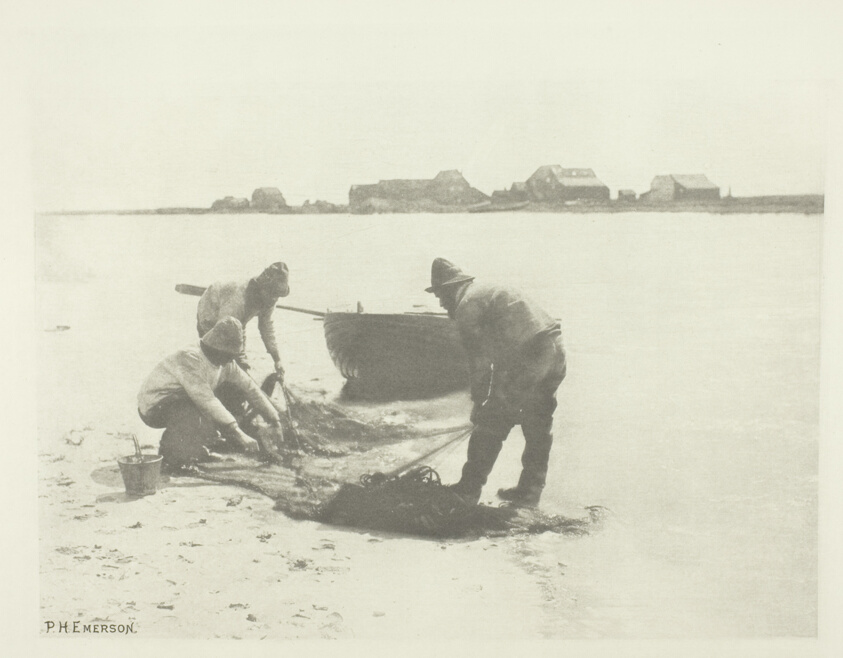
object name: Photograph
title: Smelting on the River Blythe (Suffolk)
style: 19th century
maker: Peter Henry Emerson (English, born Cuba, 1856–1936)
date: 1883/87, printed 1888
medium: Photogravure, pl. VI from the album "Pictures of East Anglian Life" (1888)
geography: England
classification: photogravure; photomechanical process; photography; photograph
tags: Collected by Hugh Edwards, Pictures of East Anglian Life, Seat of War in the Crimea